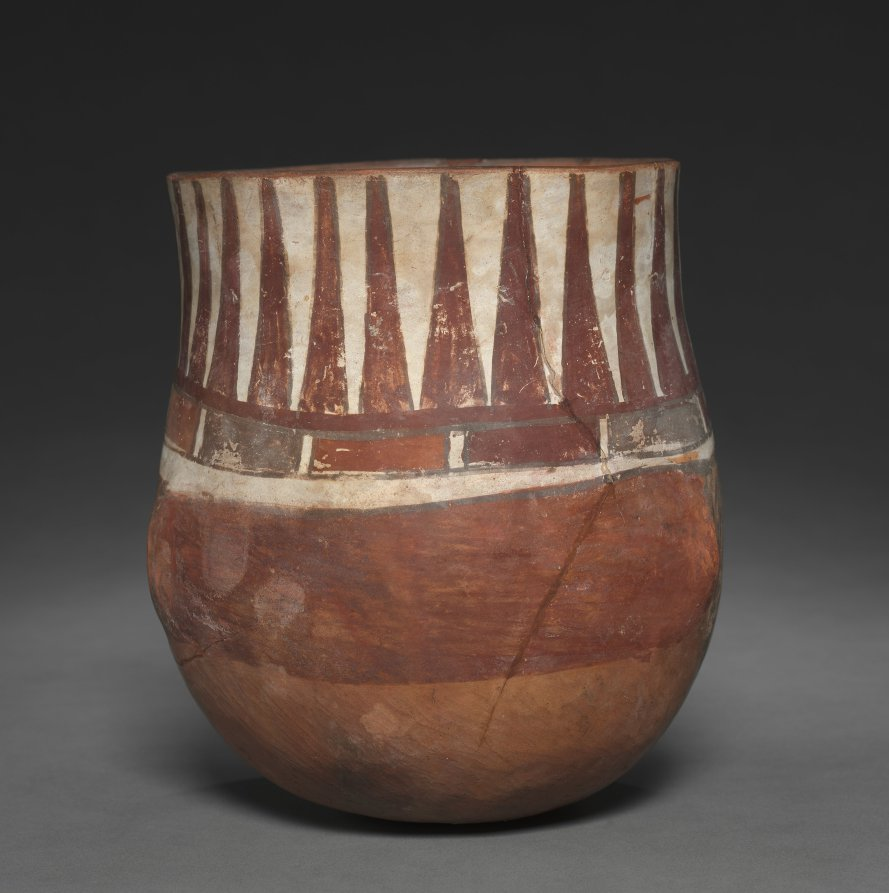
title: Vase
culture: Peru, South Coast, Nasca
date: c. 300–500 CE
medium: pottery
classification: Ceramic